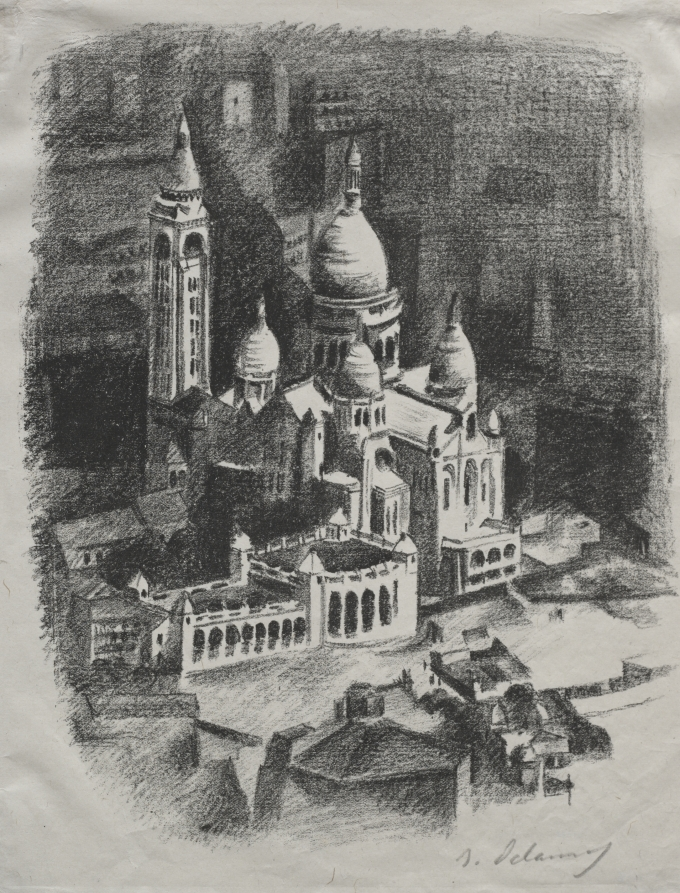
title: Allo Paris: Frontispiece to book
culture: France, 20th century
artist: Robert Delaunay (French, 1885–1941)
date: 1926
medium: lithograph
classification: Print